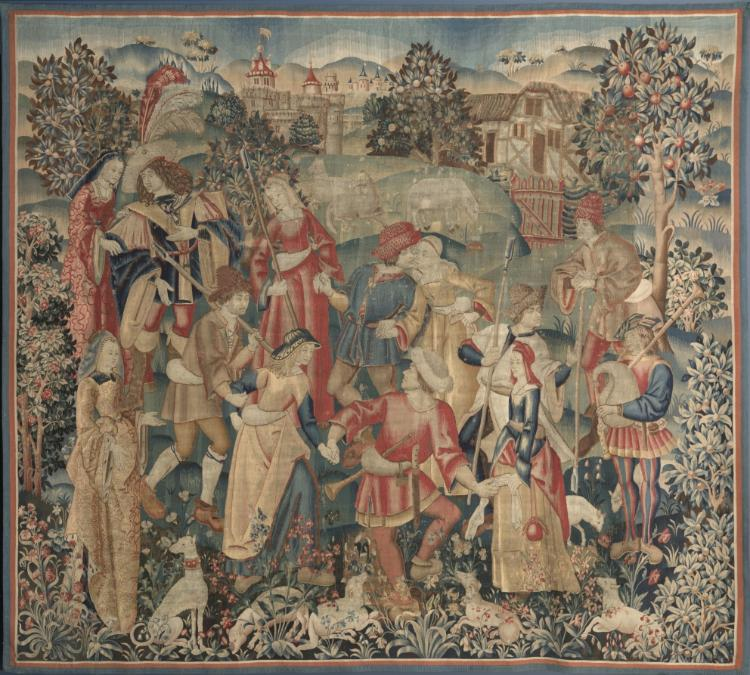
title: Shepherds in a Round Dance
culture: Netherlands, early 16th century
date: around 1500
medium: Wool and silk: tapestry weave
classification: Tapestry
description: Late medieval tapestries often use a limited yet contrasting color palette to portray stylized images. The expressions of these figures, for example, are conveyed more by their postures than by their faces. Four shepherds and shepherdesses join hands and dance to the music of a bagpiper at the far right, while a lord and two ladies on the left look on. A dog and sheep amid blossoming plants and trees contribute to the festive pastoral scene in front of a castle.